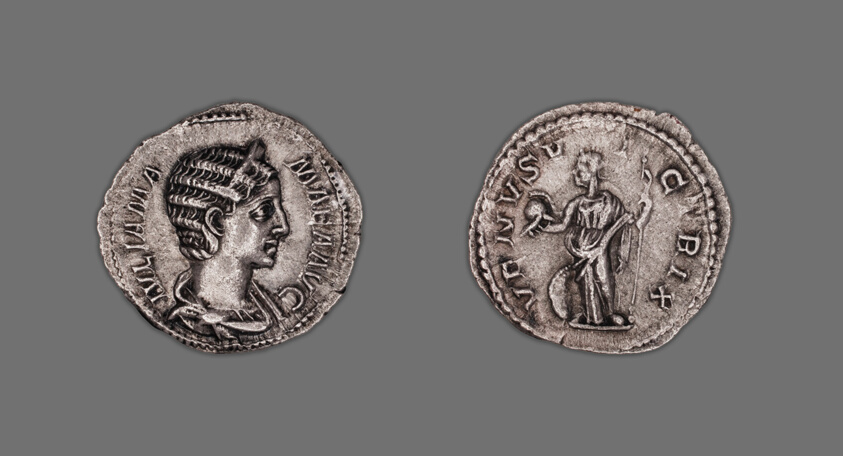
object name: Coin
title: Denarius (Coin) Portraying Julia Mamaea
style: ancient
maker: Roman, minted in Antioch, Syria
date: 231-235, issued by Severus Alexander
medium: Silver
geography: Rome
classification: coin; ancient art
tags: goddesses, gods (deities)